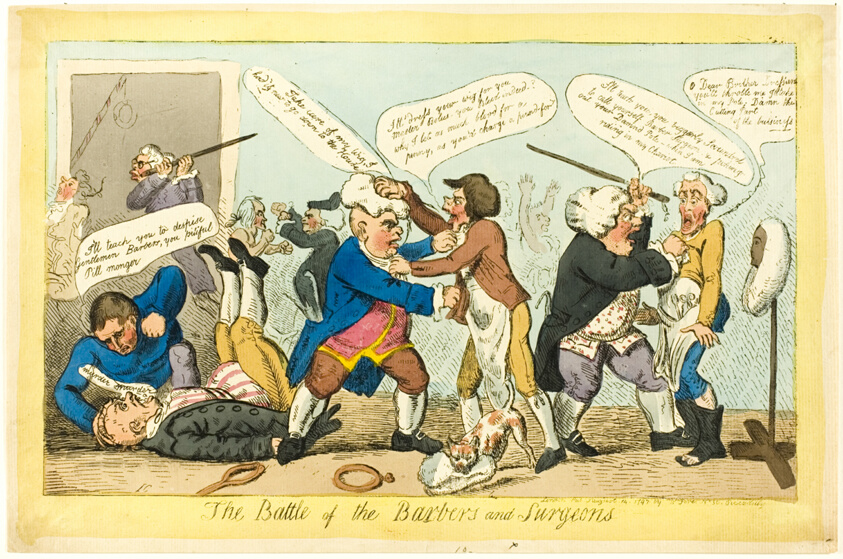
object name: Print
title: Battle of Barbers and Surgeons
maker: Isaac Cruikshank (English, 1764-1811); published by S.W. Fores (English, 1761-1838)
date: published August 14, 1797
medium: Hand-colored etching on paper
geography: England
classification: etching; print; prints and drawing